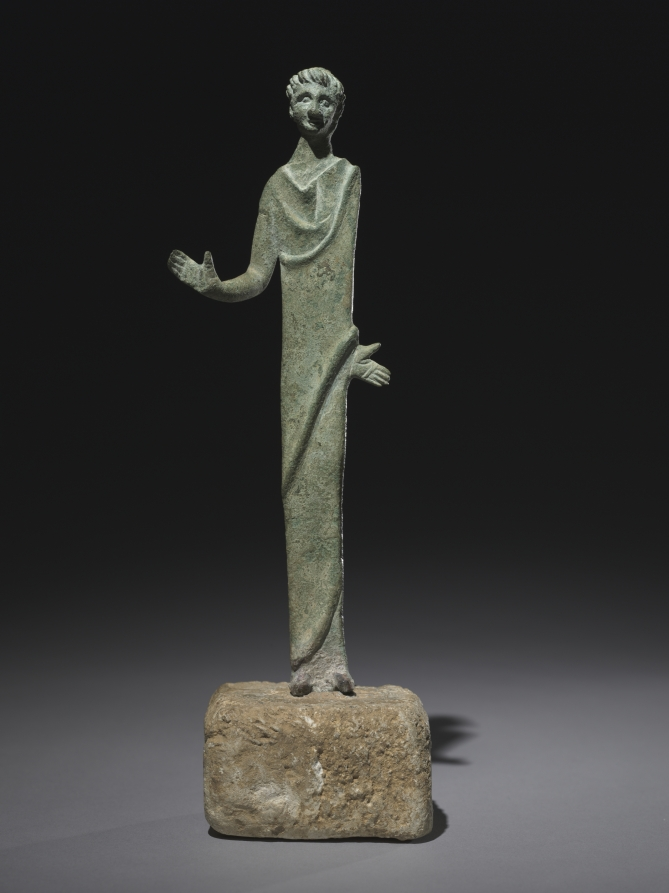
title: Male Votive Figure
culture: Etruscan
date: 300s BCE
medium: bronze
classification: Sculpture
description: This Etruscan votive figure is posed with his hands turned to expose his palms, one near his hip, the other projecting laterally. With the exception of the fully three-dimensional head and the extended right arm and hand, the side profile of this figure is shockingly flat. The tall man’s back is not only extremely thin but also an almost perfectly vertical column. Other examples of this votive figure type are even more elongated, and some hold small cups or libation dishes, as if making offerings. Some scholars have suggested that these votive figures may represent shadows due to their extreme height and relative lack of depth, while others have seen connections to much older traditions of relatively flat cult images, whether of wood or metal.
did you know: This bronze statuette was cast in a single piece.